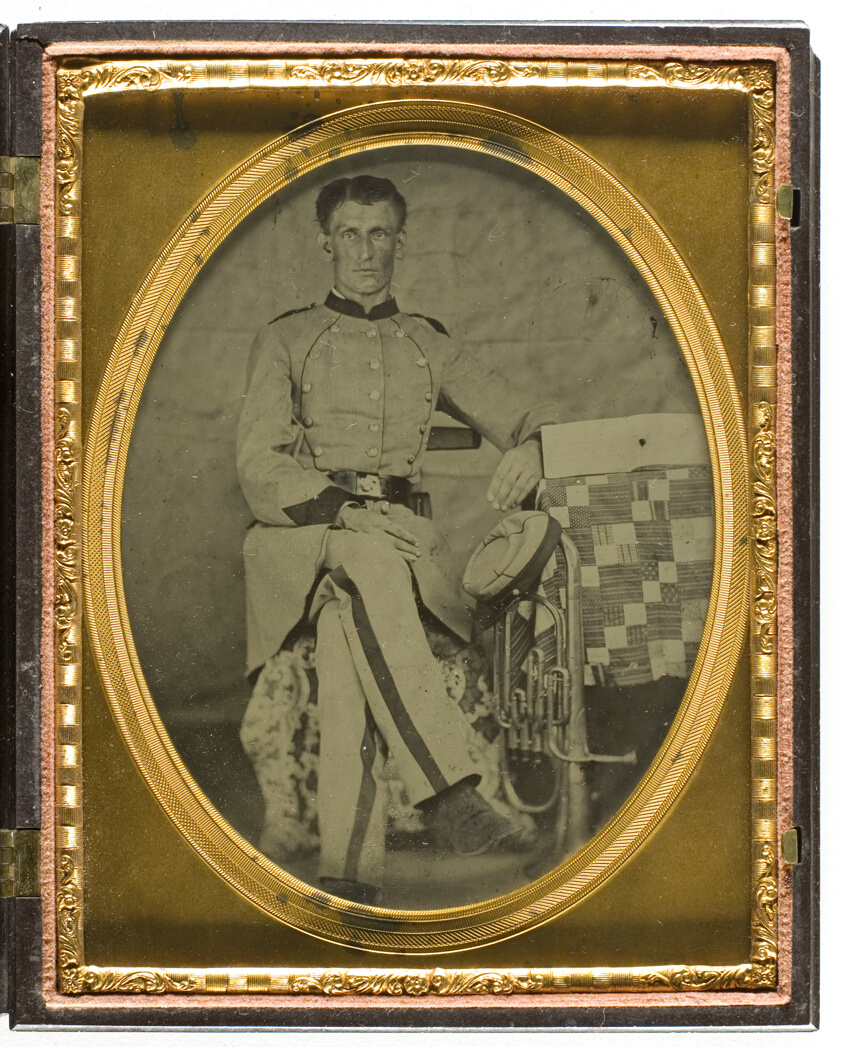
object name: Photograph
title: Untitled (Confederate Officer)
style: 19th century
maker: Artist unknown; American, 19th century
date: 1860s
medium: Tintype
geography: United States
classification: daguerreotype; photographic process; photography; photograph